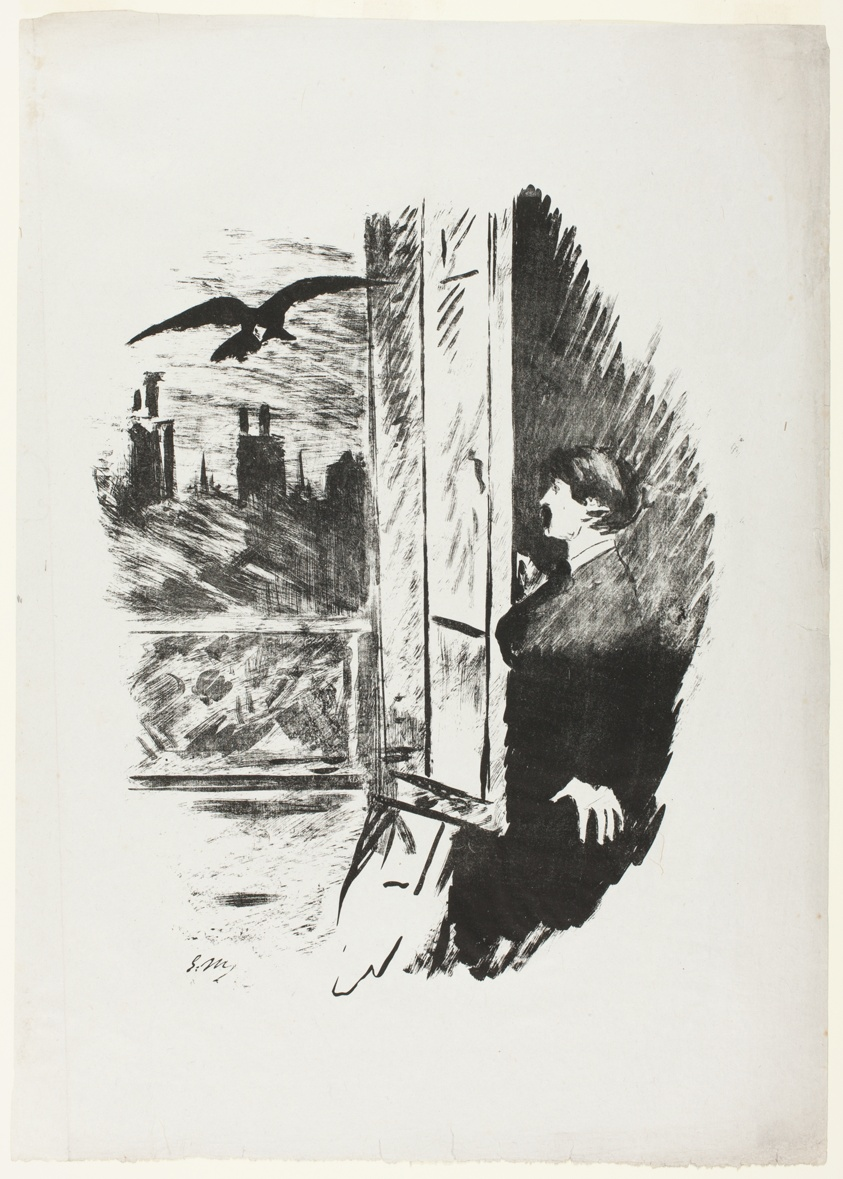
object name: Print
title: At the window ("Open here I flung the shutter..."), from The Raven (Le Corbeau)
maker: Édouard Manet (French, 1832-1883); written by Edgar Allan Poe (American, 1809-1849); translated and produced by Stéphane Mallarmé (French, 1842-1898); printed by Lefman et Cie. (French, 19th century); published by Richard Lesclide (French, 1825-1892)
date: 1875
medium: Transfer lithograph in black on gray China paper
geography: France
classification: relief etching; print; prints and drawing